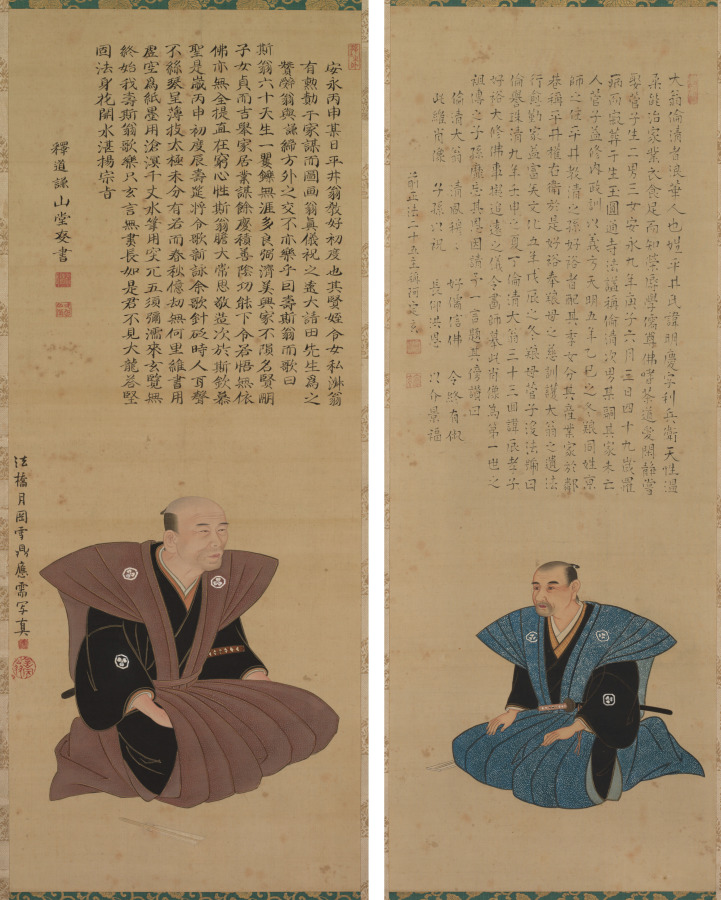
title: Pair of Portraits of Samurai-Officials: Hirai Kyosei and Hirai Rinsei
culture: Japan, Edo period (1615–1868)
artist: Sando Hyosho (Japanese)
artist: Tsukioka Settei (Japanese, 1710–1786)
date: 1776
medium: hanging scrolls; ink and color on silk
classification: Painting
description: In this pair of figure paintings, the artist provided generational portraits of two clan leaders from the Hirai family, accompanied by lengthy inscriptions in a distinctive calligraphic style from separate scholar-officials.